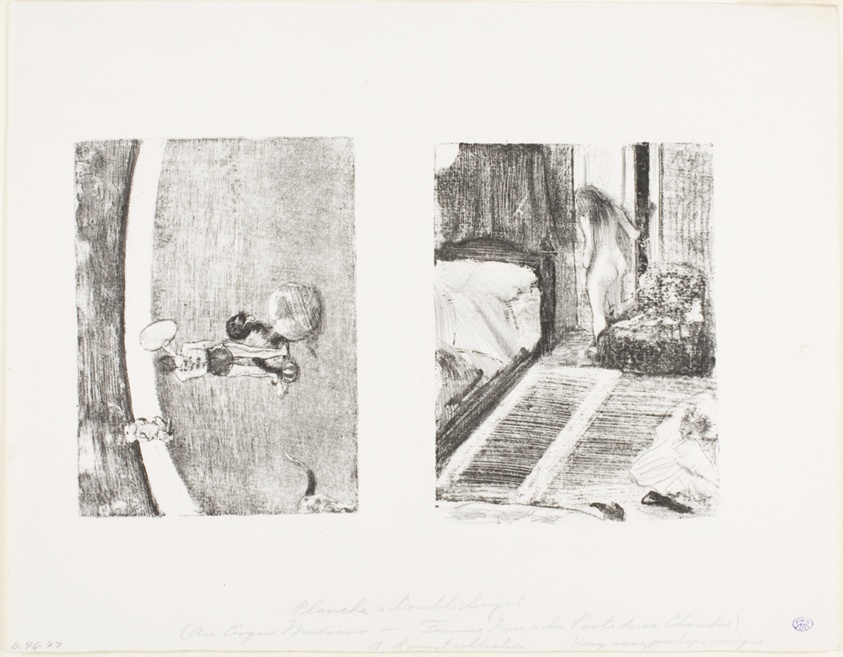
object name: Print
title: At the Cirque Fernando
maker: Edgar Degas; French, 1834-1917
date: 1879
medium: Lithograph in black on white wove paper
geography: France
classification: lithograph; print; prints and drawing; paper